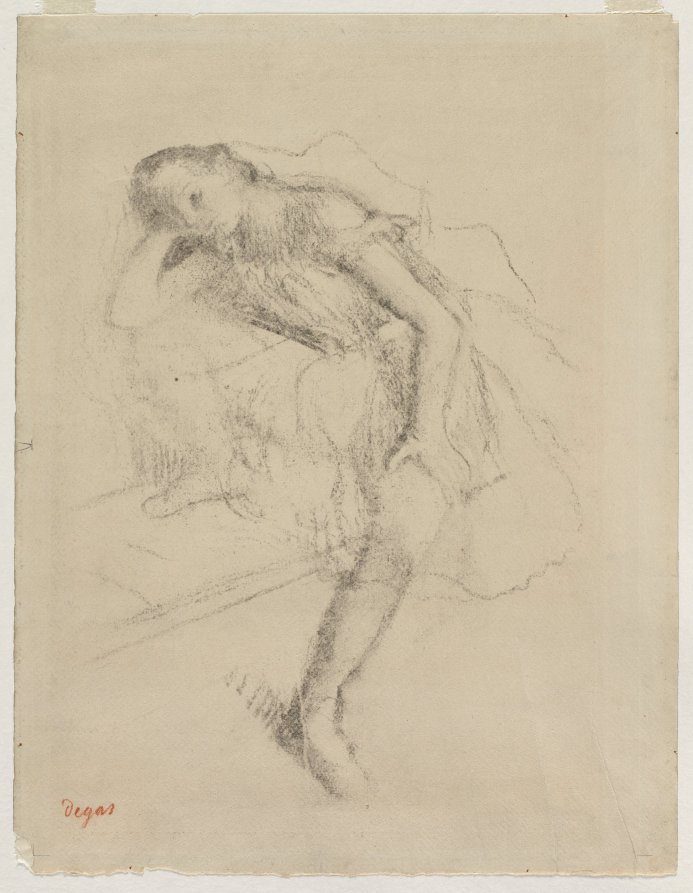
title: Dancer at Rest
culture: France, 19th century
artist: Edgar Degas (French, 1834–1917)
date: c. 1895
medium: charcoal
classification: Drawing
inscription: signed, lower left, in red crayon: Degas ; VERSO, center, in blue crayon: 1140 / [P ?]b758 [underlined twice] ; lower right, in graphite: 43 x 33 ; lower left, in graphite: a58764 [underlined] / OXX- [partially erased] ; lower right, in graphite: Danseuse au repos (fusain) (partially erased)